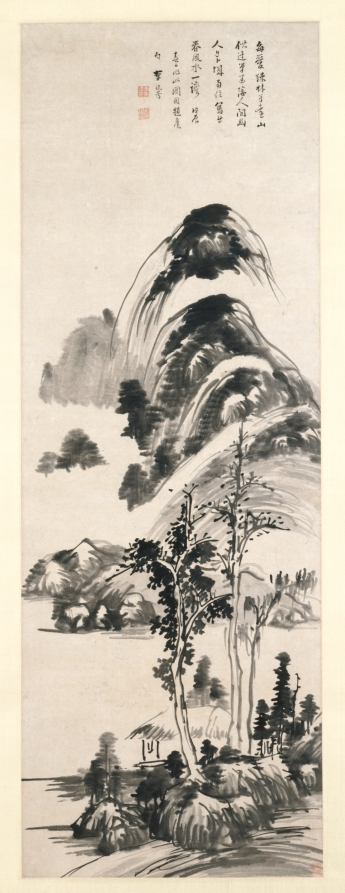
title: Thin Forest and Distant Mountains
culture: China, Ming dynasty (1368–1644)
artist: Li Liufang (Chinese, 1575–1629)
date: 1628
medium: hanging scroll, ink on paper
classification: Painting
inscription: Artist's inscription, signature, and 2 seals: Thin forest and distant mountains have always attracted me; As if they were from the brush and ink of Ni Tsan, left behind by the master in this mortal world. Now that the quiet recluse has chosen to live in the South of the City. He paints the spring breeze---over a curve of the river. In the spring day of the wu-ch'en year [1628] I made this painting and attached an old poem. Li Liu-fang [seals] Li Liu-fang-yin; Chang-heng shih. trans. WKH 1 additional seal of Chung Wen-ming (17th c.).